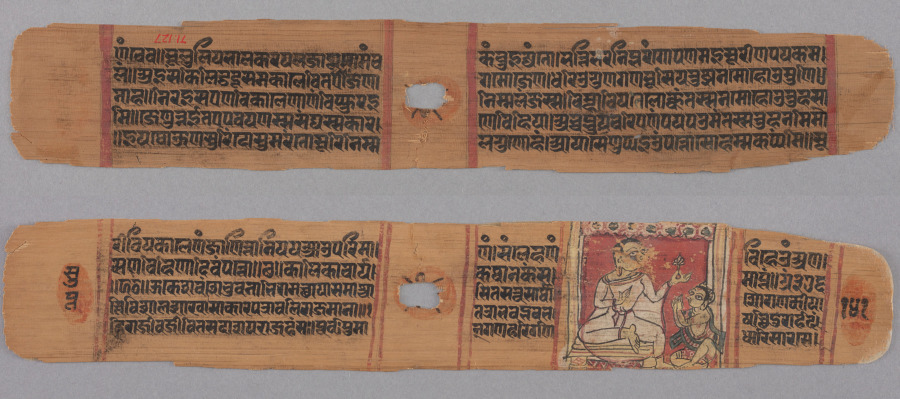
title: Folio 141, from a Kalpa-sutra and Story of Kalakacharya: Text (recto); Monk Holding a Flower Venerated by a Lay disciple (verso)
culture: Western India, Gujarat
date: 1287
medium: Gum tempera and ink on palm leaf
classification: Painting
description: Palm leaf was the preferred material for sacred texts before the 1400s in India. The text here was often appended to the Kalpa-sutra, the most sacred book of Jainism. This story concerns the life of a Jain teacher named Kalaka, a prince who developed the ability to work magic after he become a monk, inspired by the teachings of a holy man. The painting on this page shows a monk clad in white, indicating his affiliation with the Shvetambara (“white clad”) branch of Jainism. It is the second to the last page of the manuscript and includes the beginning of the colophon, which contains information about when and where this manuscript was produced.